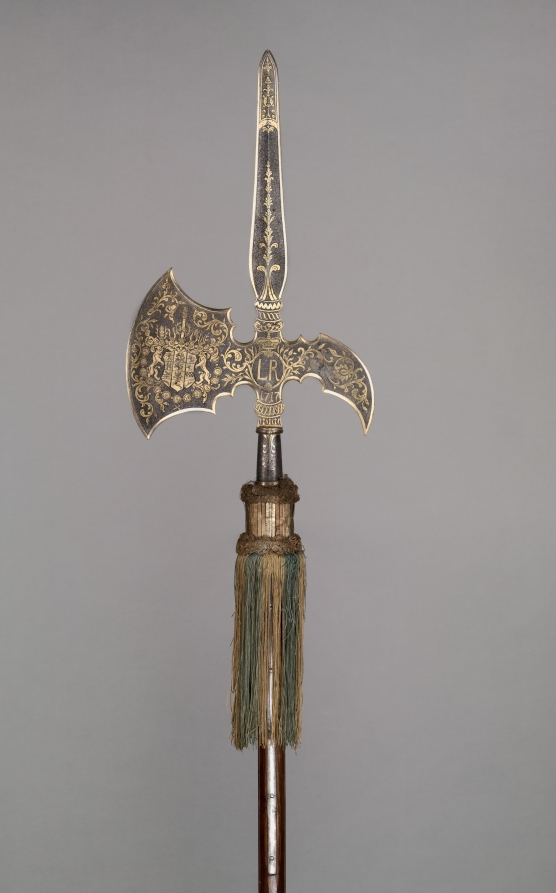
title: Parade Halberd (from the bodyguard of Ludwig Rudolf, Duke of Brunswick- Wolfenbüttel [1671-1735])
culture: Germany, 18th century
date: 1717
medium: blued, etched and gilded steel, wooden haft with orginal steel base spike, silk tassel with alternating blue and gold bands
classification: Arms and Armor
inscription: 'LR'; 1717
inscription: Coat of Arms Brunswick-Wofenbüttel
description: The halberd and partisan are hafted weapons highly favored by European infantries of the 1500s and 1600s for their great versatility and deadly effect. From about 1550 on, these weapons underwent significant changes as they gradually became more ornamental. The large flat surfaces of the blades lent themselves to engraving, etching, gilding, and other forms of decoration. They also provided the perfect location for the coats of arms of princely or noble families. For this reason, hafted weapons became the favored parade weapons of palace guards and splendidly outfitted special regiments of princely bodyguards. These examples, made for the German dukes of Brunswick at Schloss Blankenburg, still have their silk tassels in their original colors of blue and yellow.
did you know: A halberd is a mix between a battle ax and a spear.